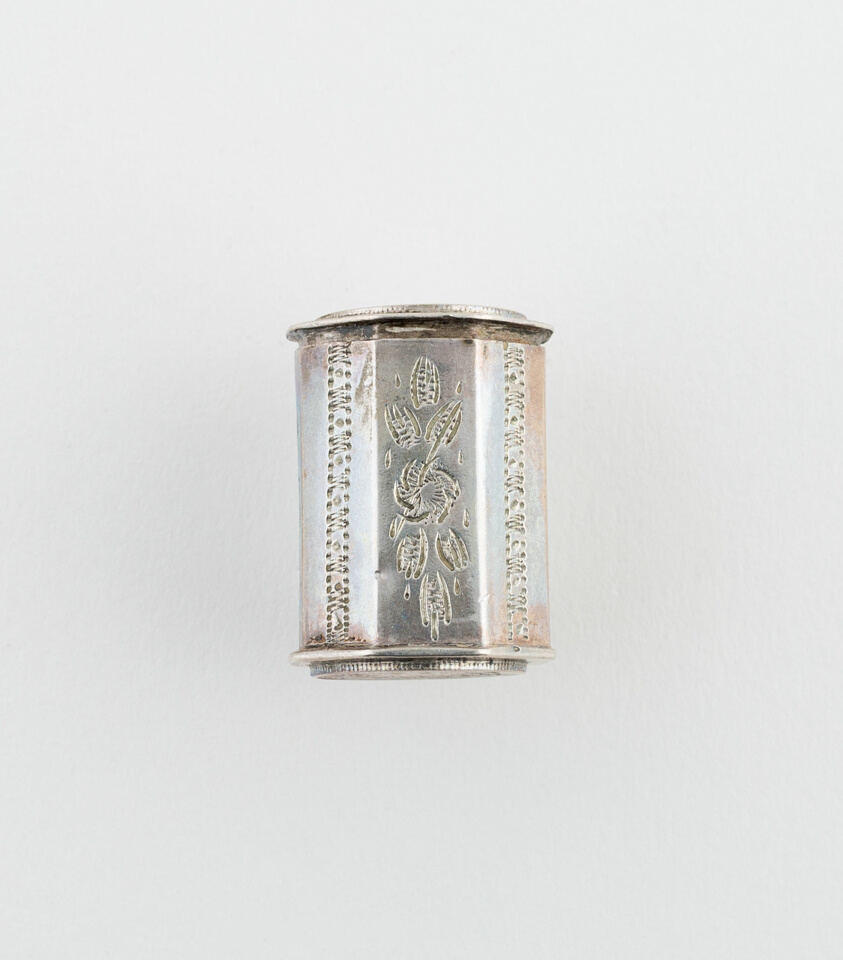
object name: Metalwork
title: Coin Container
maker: Netherlands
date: c. 1876/77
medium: Silver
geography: Netherlands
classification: container for personal use; box; european decorative arts; metalwork; silver; decorative object/ornament